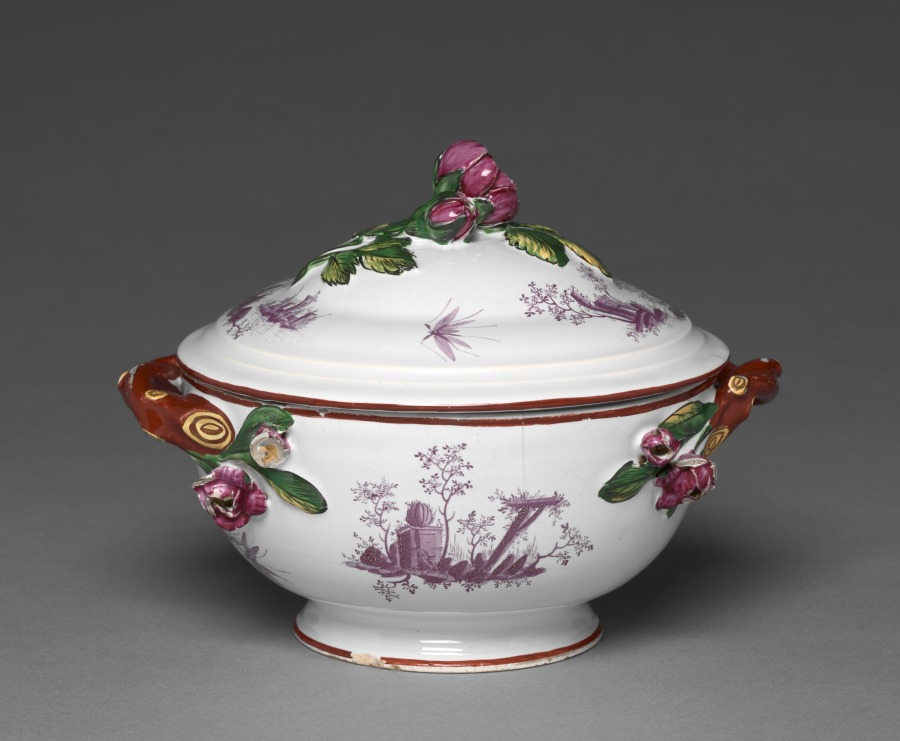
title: Covered Bowl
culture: France, 18th century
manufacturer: Saint-Clément Factory (French)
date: c. 1775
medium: tin-glazed earthenware (faience) with enamel decoration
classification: Ceramic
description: The faience factory at Saint-Clément in eastern France closely imitated the styles and techniques employed by the Hannong's at Strasbourg. The monochrome landscapes in red on this covered bowl demonstrate the influence of German, in this case Meissen, porcelain on the faience made in this part of France.